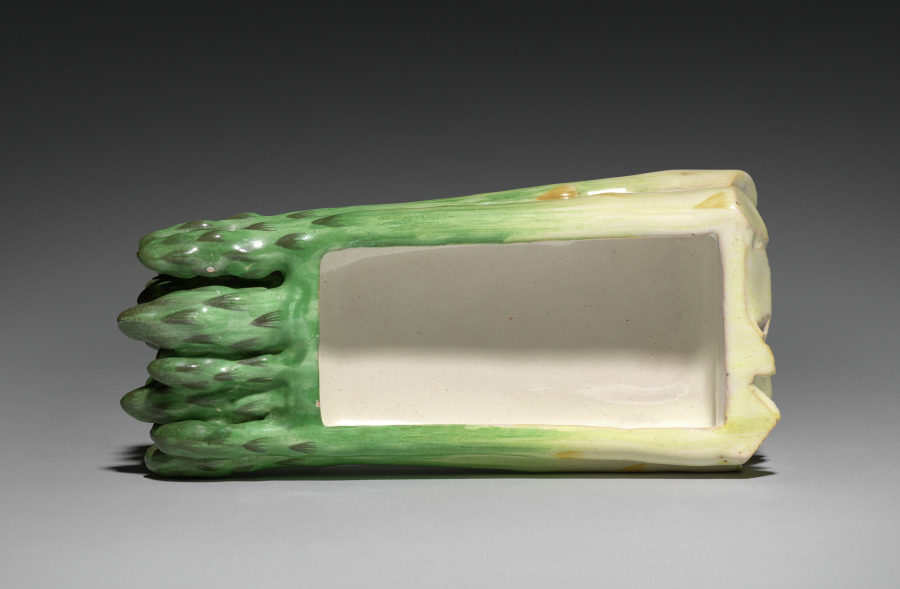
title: Box in the Form of Asparagus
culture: France, Sceaux(?), 18th century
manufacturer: probably by Sceaux Factory (French, active 1748–66)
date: c. 1765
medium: tin-glazed earthenware (faience) with enamel decoration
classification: Ceramic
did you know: Placed upon the dinner table, this container's lid might be lifted to reveal steaming asparagus. Imagine a wealthy 18th-century dining room with flickering candles, whimsical sculptures, and dishes like this decorating the table.